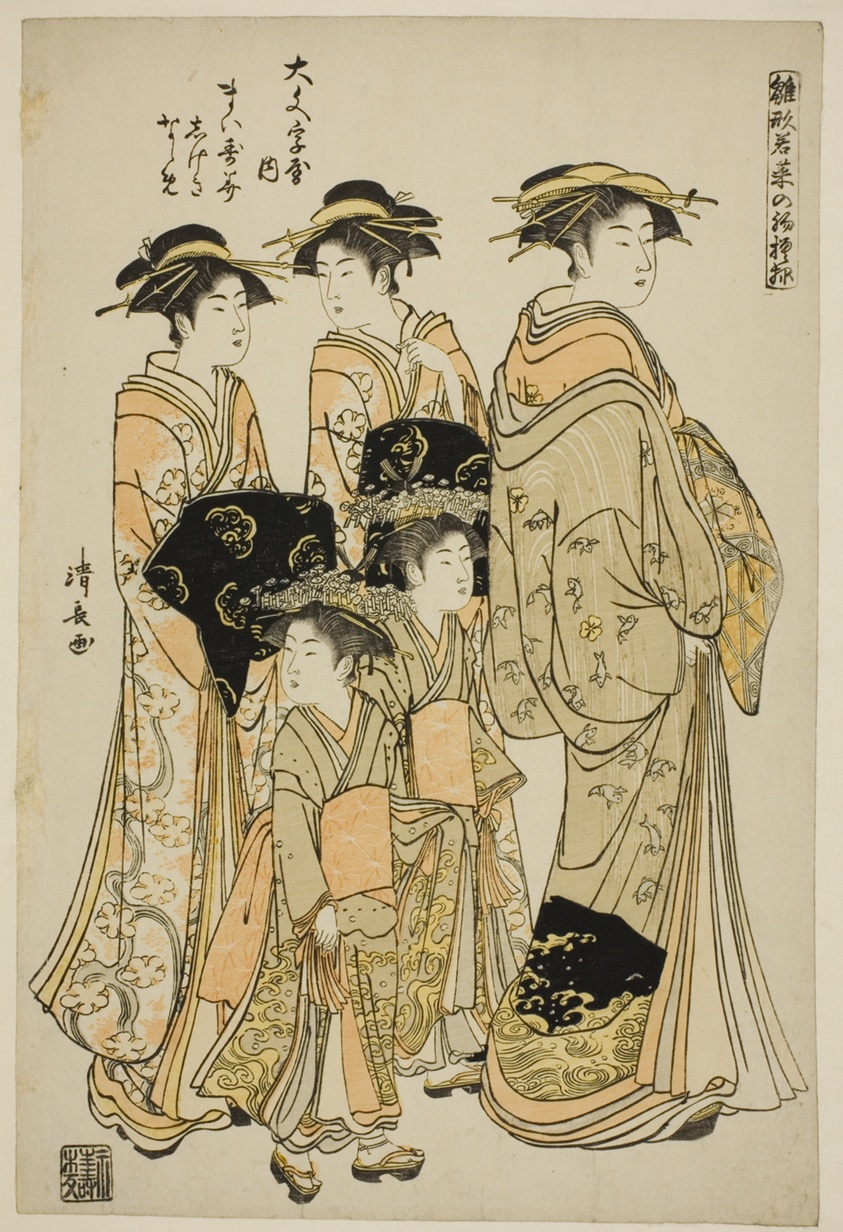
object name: Print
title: The Courtesan Maizumi of the Daimonjiya with Her Attendants Shigeki and Naname, from the series "Models for Fashion: New Designs as Fresh as Young Leaves (Hinagata wakana no hatsu moyo)"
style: Japanese (culture or style)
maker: Torii Kiyonaga (Japanese, 1752-1815)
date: 1782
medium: Color woodblock print; oban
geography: Japan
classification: woodblock print; print; asian art